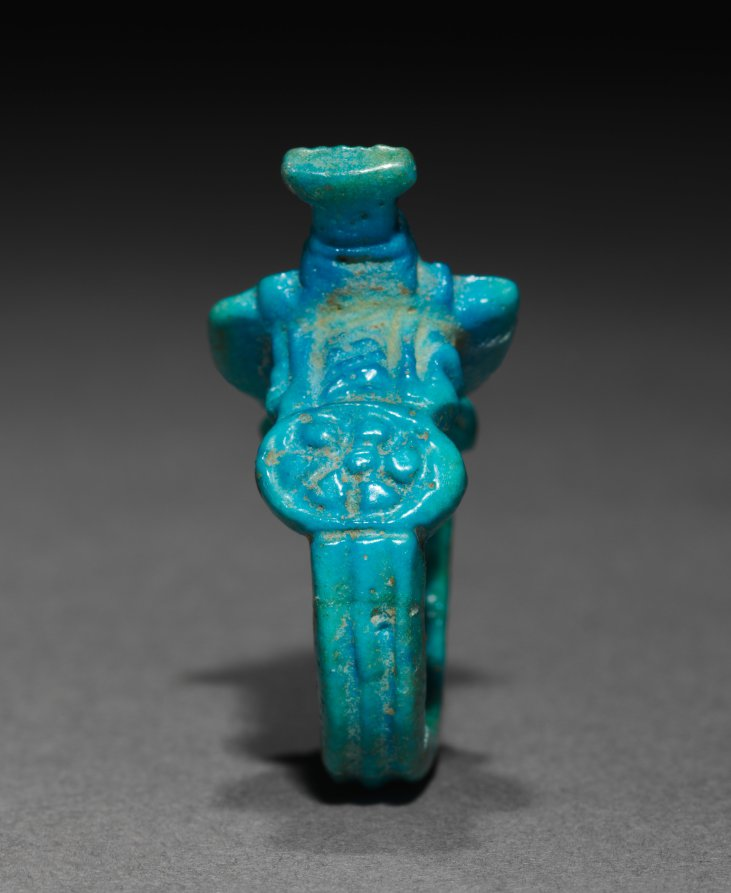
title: Ring with Aegis of Nepthys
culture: Egypt, Third Intermediate (1069–715 BCE), Dynasty 22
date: 945–715 BCE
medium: turquoise faience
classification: Jewelry